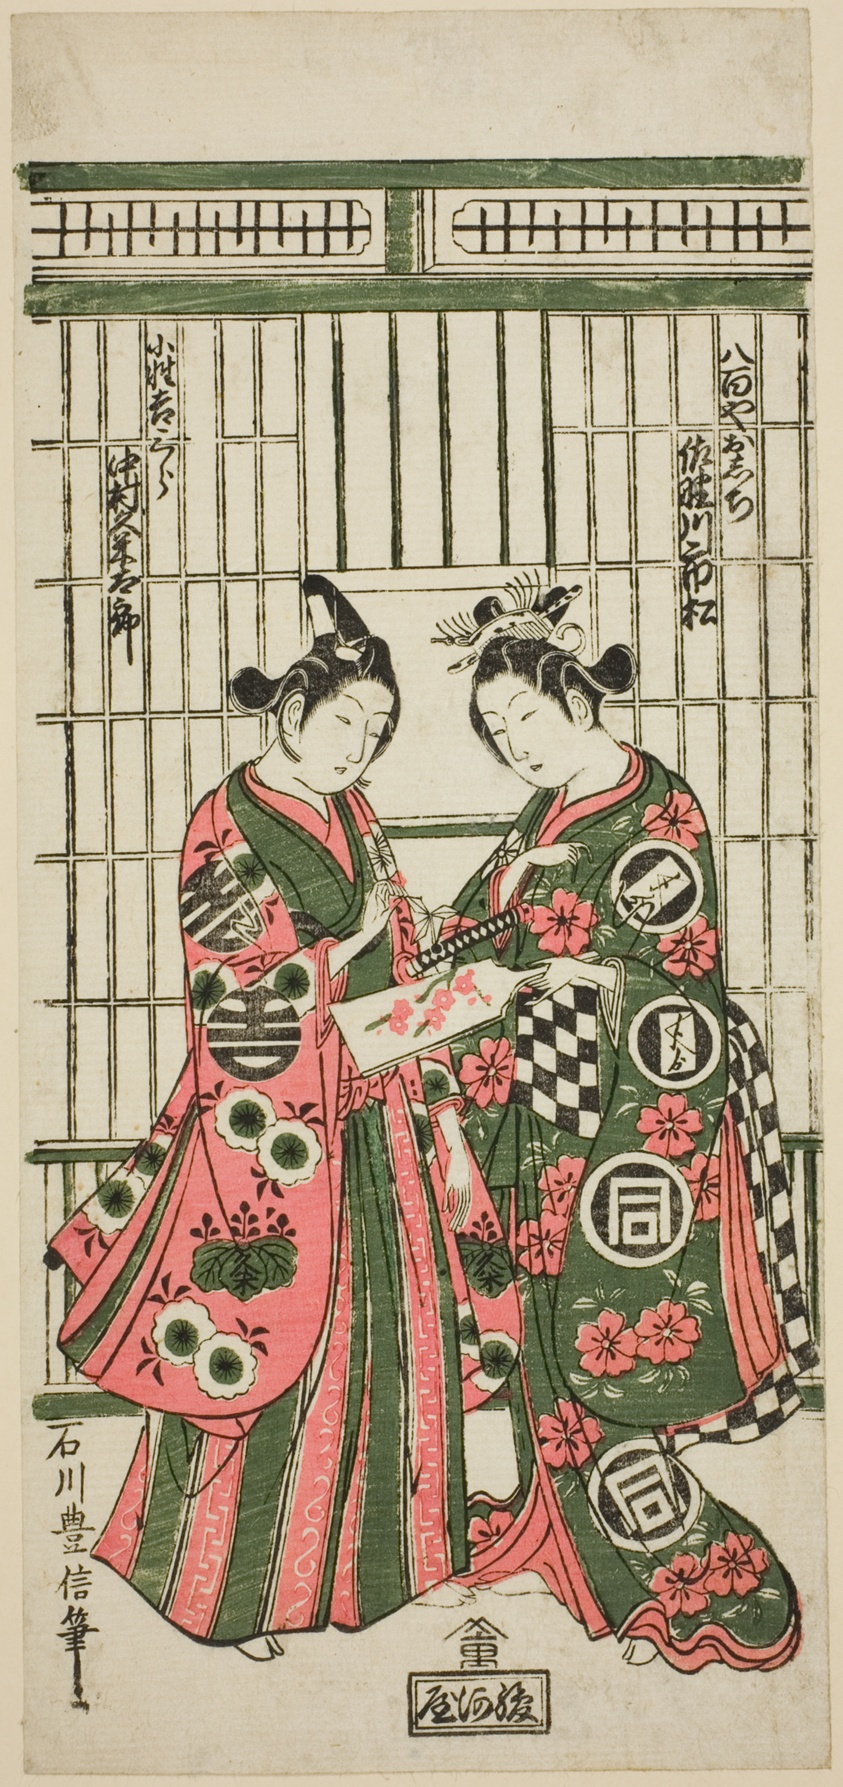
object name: Print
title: The Actors Sanogawa Ichimatsu I as Oshichi and Nakamura Kumetaro I as Kichisaburo in the play "Izu Kosode Shobai Kagami," performed at the Nakamura Theater in the second month, 1751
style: Japanese (culture or style)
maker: Ishikawa Toyonobu (Japanese, 1711-1785)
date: 1751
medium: Color woodblock print; hosoban, benizuri-e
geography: Japan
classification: woodblock print; print; asian art